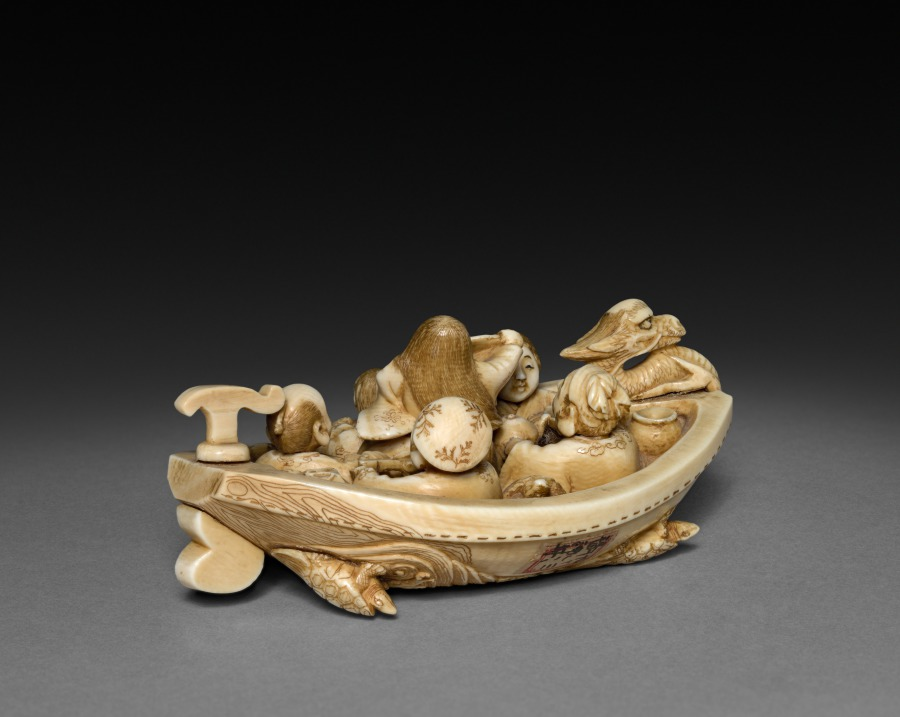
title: Boat with Six Passengers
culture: Japan, Edo period (1615–1868) to Meiji period (1868–1912)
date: c 1800s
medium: ivory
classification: Netsuke